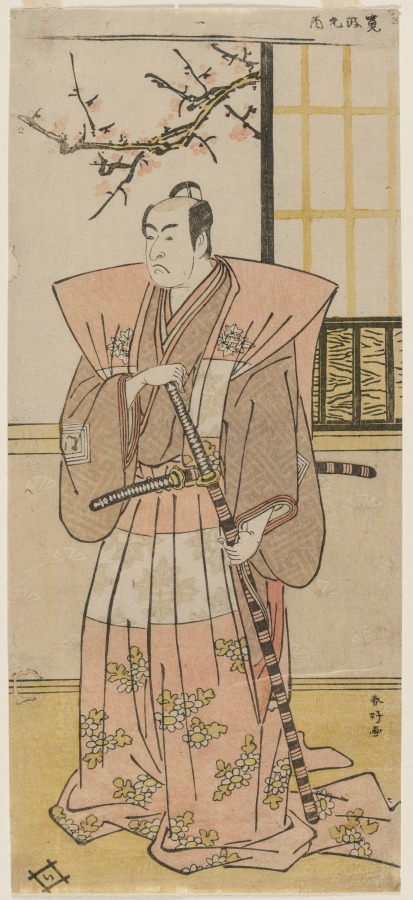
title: Ichikawa Monnosuke II as a Lord in Formal Dress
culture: Japan, Edo period (1615–1868)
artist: Katsukawa Shunkō (Japanese, 1743–1812)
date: 1789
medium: color woodblock print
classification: Print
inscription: Signature: Shunko ga